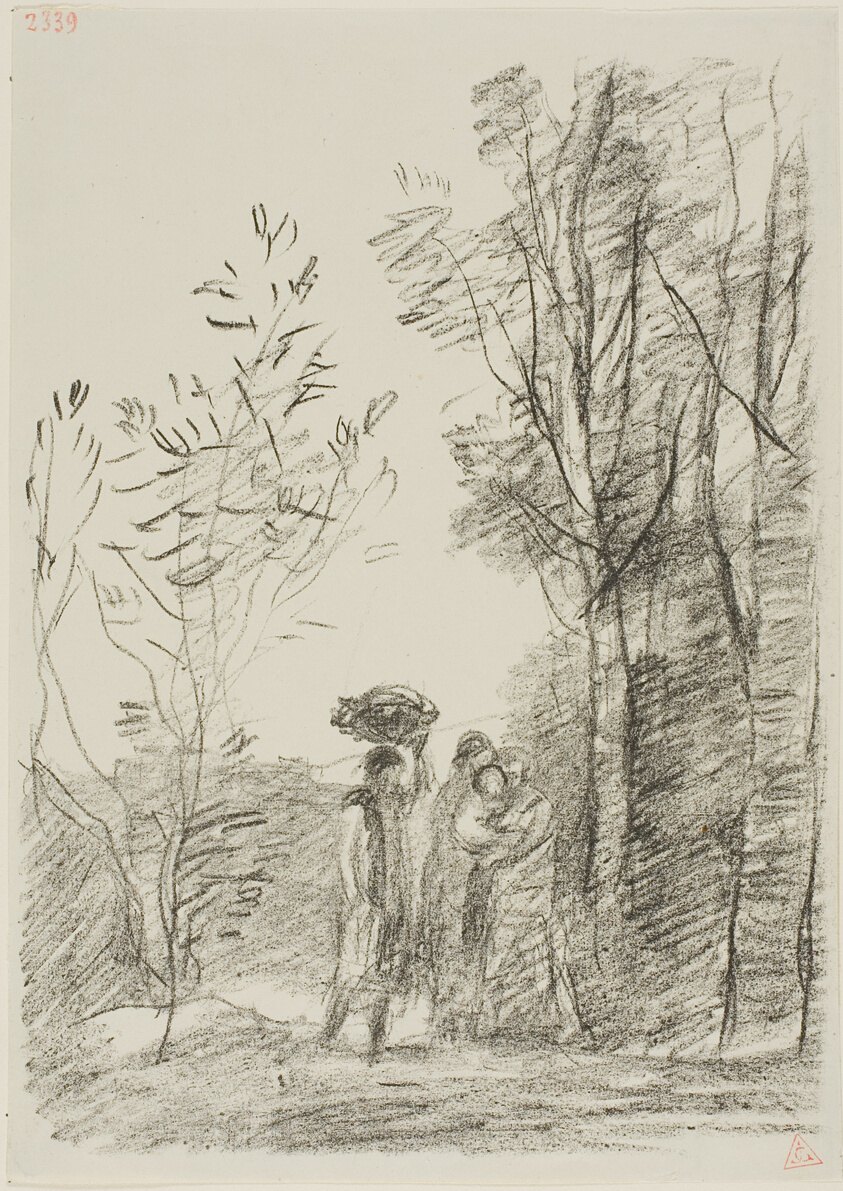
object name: Print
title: Meeting in the Woods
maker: Jean-Baptiste-Camille Corot; French, 1796-1875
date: 1871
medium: Transfer lithograph on cream China paper laid down on white wove paper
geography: France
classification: lithograph; print; prints and drawing